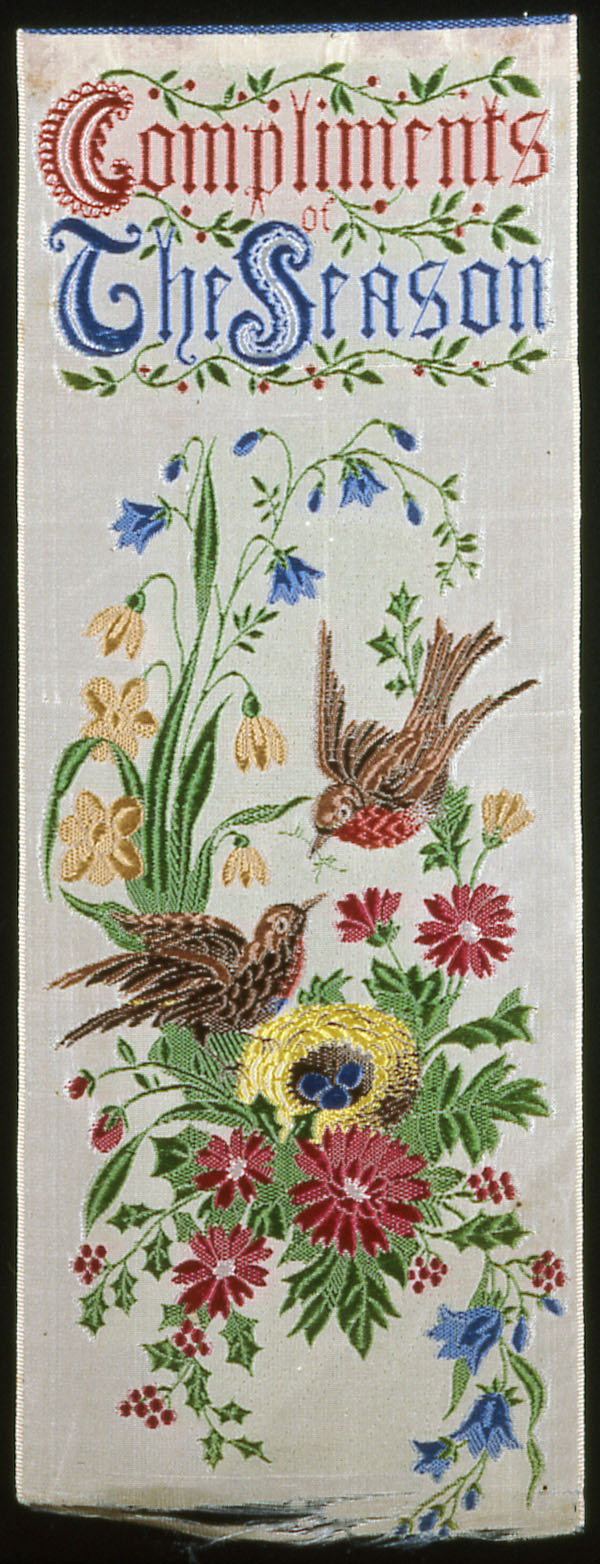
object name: Textile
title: Commemmorative Ribbon "Compliments of the Season"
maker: Woven by Thomas Stevens (English, 1828–88); Coventry and London, England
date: 19th century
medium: Silk, plain weave with supplementary brocading wefts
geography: Coventry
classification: textile; weaving